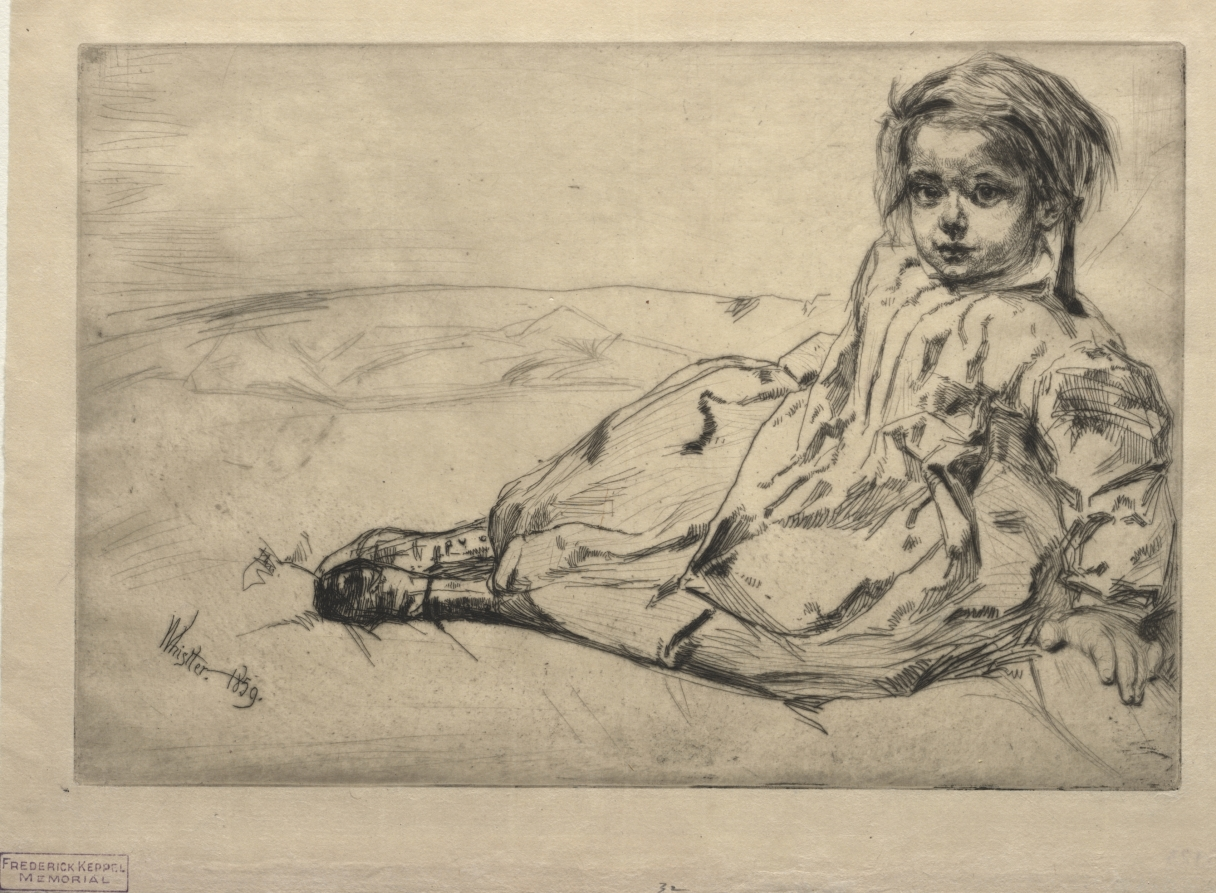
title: Bibi Valentin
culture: America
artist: James McNeill Whistler (American, 1834–1903)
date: 1859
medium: etching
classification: Print